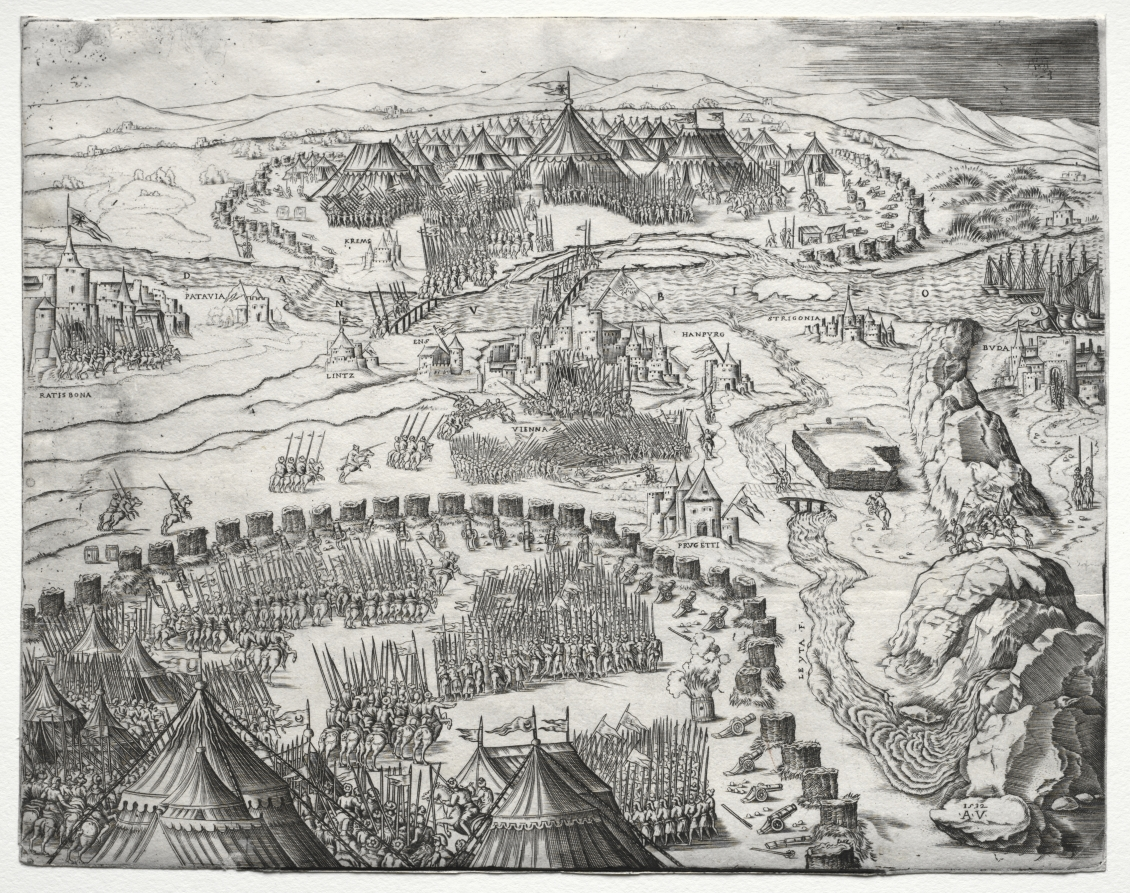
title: The Position and Camp of the Armies of Charles V and Soliman II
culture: Italy, 16th century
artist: Agostino Veneziano (Italian, 1490–1540)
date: 1532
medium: engraving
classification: Print